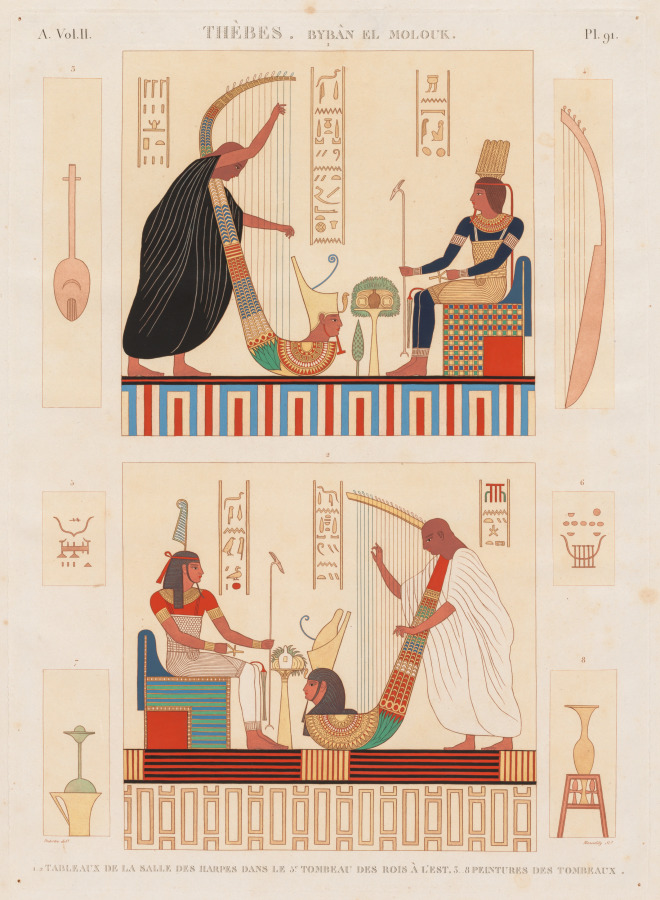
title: Description of Egypt: Thebes Byban el Molouk, Vol. II, Pl. 91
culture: France, 19th century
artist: Antoine Maxime Monsaldy (French, 1768–1816)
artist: after André Dutertre (French, 1753–1842)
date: 1812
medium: engraving, printed in sanguine hand-colored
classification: Print